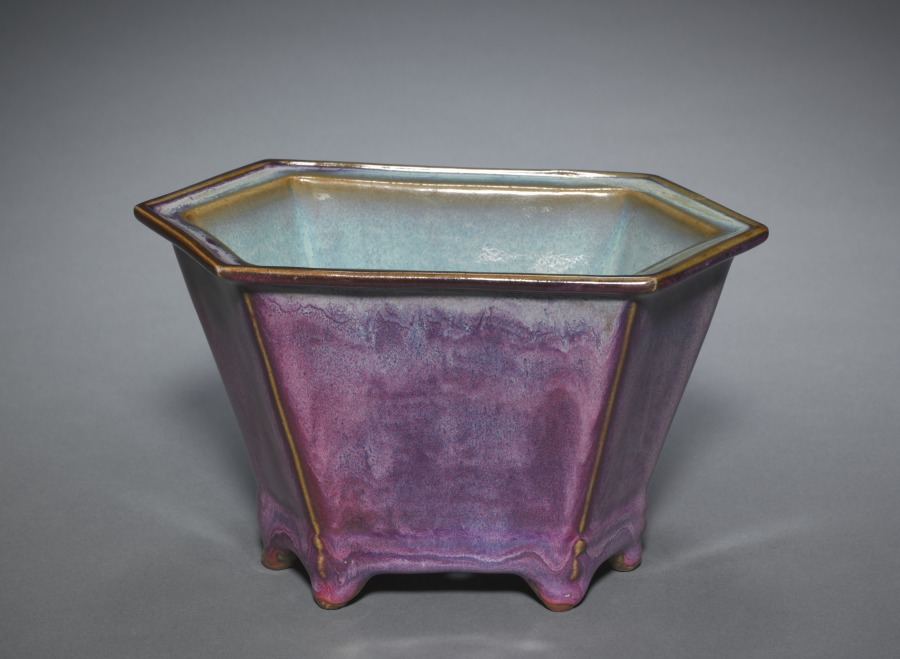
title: Hexagonal Flower Pot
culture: China, Henan province, Yuxian, Juntai, Ming dynasty (1368-1644)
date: early 1400s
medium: porcelaneous stoneware, numbered Jun ware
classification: Ceramic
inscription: 十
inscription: 明窓用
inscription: 養心殿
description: This deep hexagonal flowerpot, one of a pair in the collection, is numbered "10" and bears additional inscriptions to specifically indicate the location of its usage within the palace: "for use in the Study of Illumination (Mingchuang yong)" within the "Hall of Cultivating the Mind (Yangxin Dian)" of the Forbidden City. The inscriptions seem to suggest the Qing imperial provenance of this flower pot.